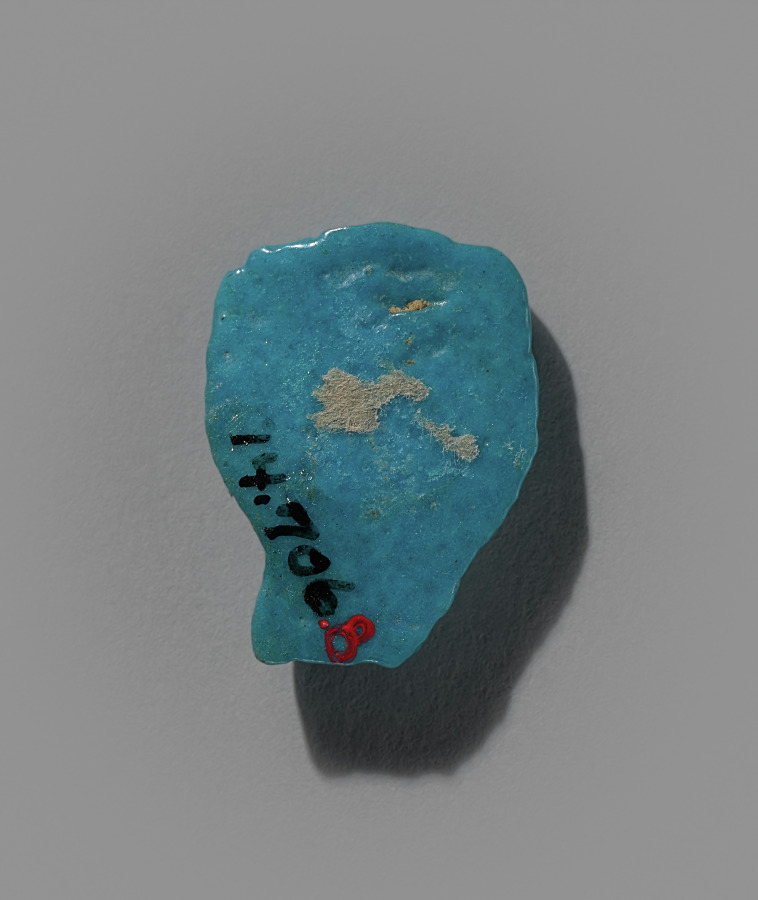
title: Food Model Amulet: Brace of Duck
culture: Egypt, New Kingdom (1540–1069 BCE), Dynasties 19–20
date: 1295–1069 BCE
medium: turquoise faience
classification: Amulets